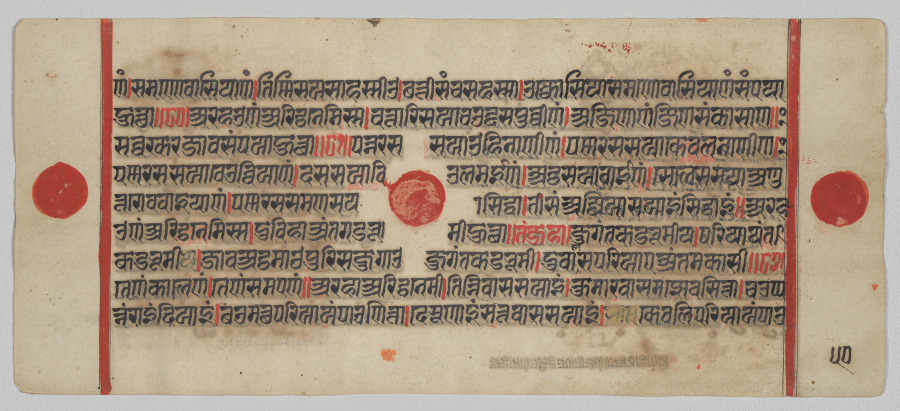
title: Text, Folio 50 (verso), from a Kalpa-sutra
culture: Western India, Gujarat, last quarter of the 15th century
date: c. 1475–1500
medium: Gum tempera, ink, and gold on paper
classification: Painting